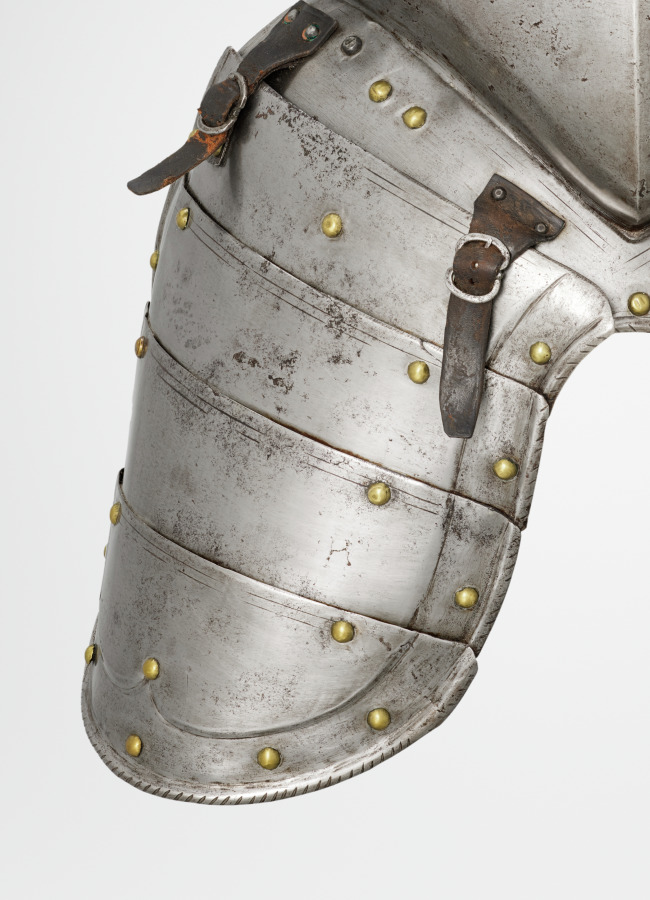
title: Tasset (proper right)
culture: South Germany, 16th century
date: c. 1560–1580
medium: steel, leather straps, brass rivets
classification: Arms and Armor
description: This armor was developed for the joust-a sporting combat between two mounted contestants. Although all of the elements of this armor date from the same period, they are not all from the same suit. This armor is thus called "composed." It also shows the asymmetry of jousting armor. The participants rode along a wall-like barrier known as a "tilt" with their left sides facing one another. Consequently, armor on that side of the body had to be thicker. Note the large plate (grandguard) over the left shoulder for extra protection. Also, the breathing holes in the helmet were placed on the right side (farthest from an opponent's lance) to avoid injuries from splinters. The bracket attached to the right breastplate is called the lance-rest, a shock-absorbing support designed to accommodate the lance when "couched" under the right armpit.